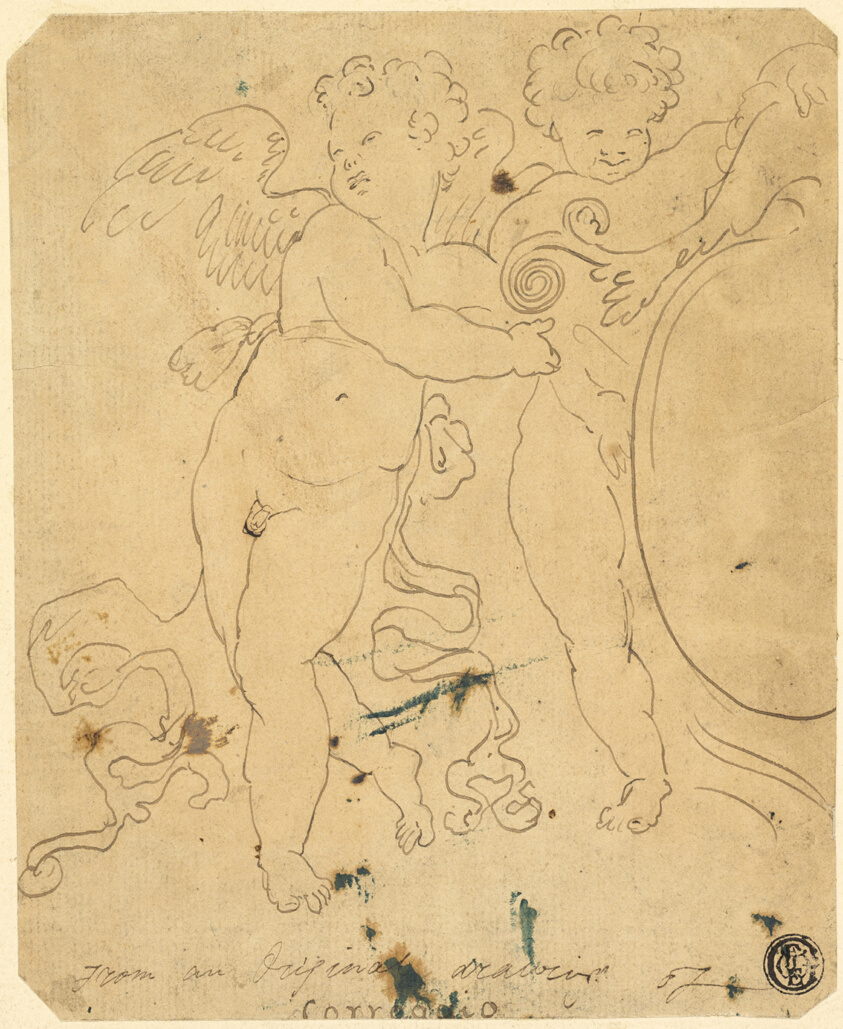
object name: Drawing and Watercolor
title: Putti with Shield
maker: After Correggio; Italian, c. 1489-1534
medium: Pen and brown ink on tan laid paper, laid down on cream wove paper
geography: Italy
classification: pen and ink drawings; paper; drawings (visual works); prints and drawing